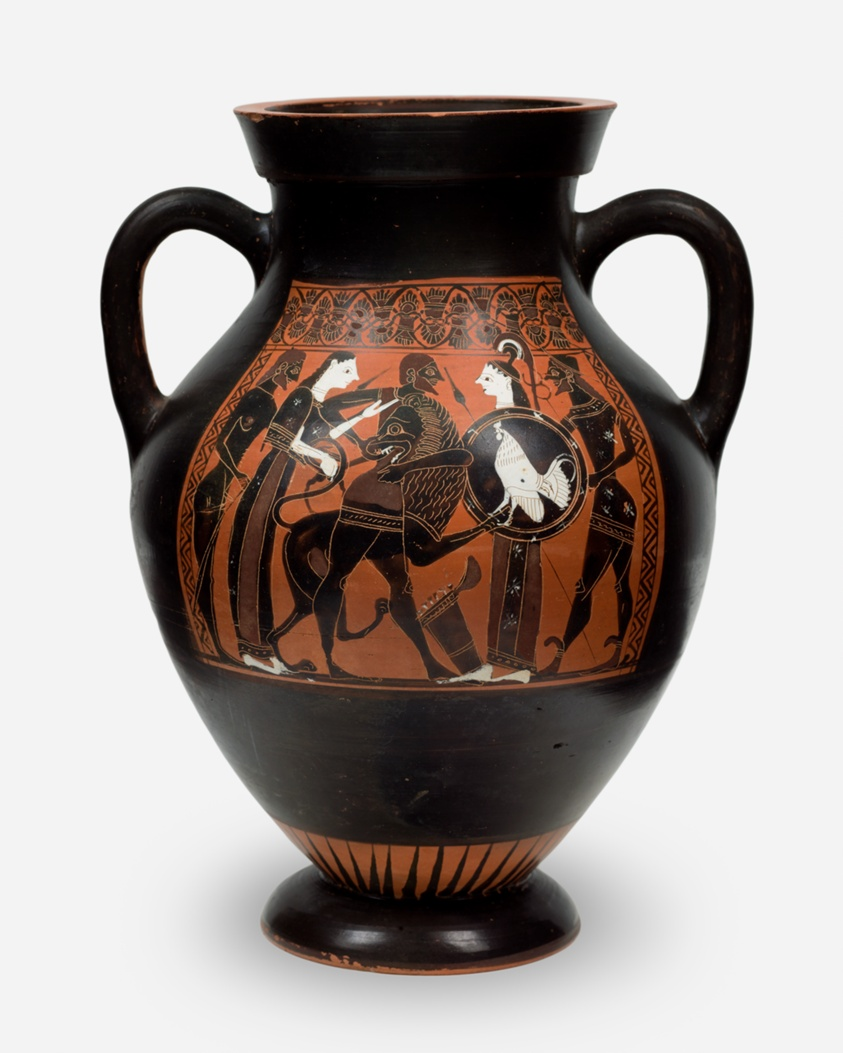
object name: Vessel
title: Belly-Amphora (Storage Jar)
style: archaic (greek), attic, black-figure, ancient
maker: Attributed to the Painter of Berlin 1686 or the Painter of Tarquinia RC 3984; Greek; Athens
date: 550-540 BCE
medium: terracotta, black-figure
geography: Athens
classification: amphora; earthenware; ceramics; vessel; ancient art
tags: mythology